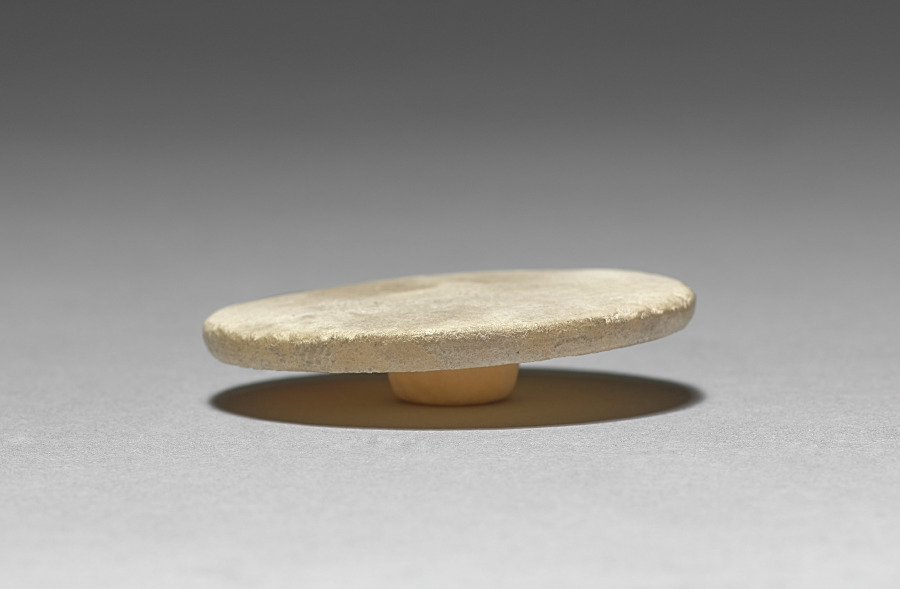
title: Kohl Jar with Lid (lid)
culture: Egypt, Middle Kingdom (2040–1648 BCE), Dynasty 12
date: 1980–1801 BCE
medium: travertine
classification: Vessels